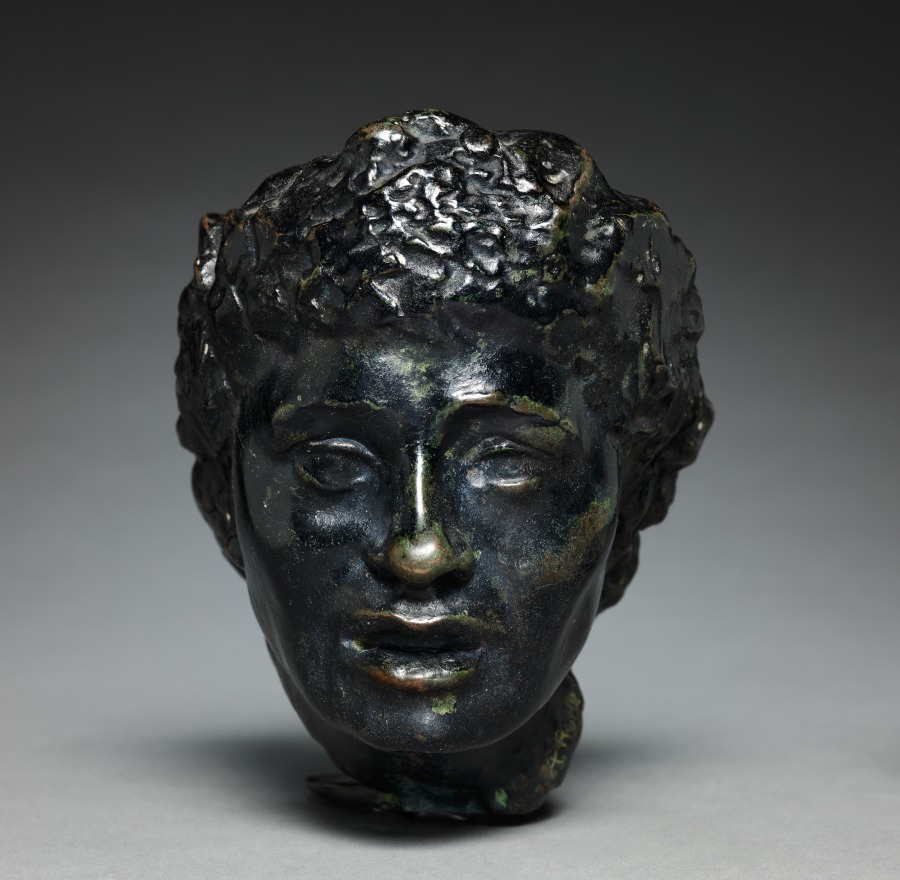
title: Mask of Séverine (Caroline Rémy)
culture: France, 19th century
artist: Auguste Rodin (French, 1840–1917)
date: 1893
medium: bronze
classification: Sculpture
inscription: Signed sinister side of neck: "A. Rodin"; inside dexter side in relief: "A. Rodin"